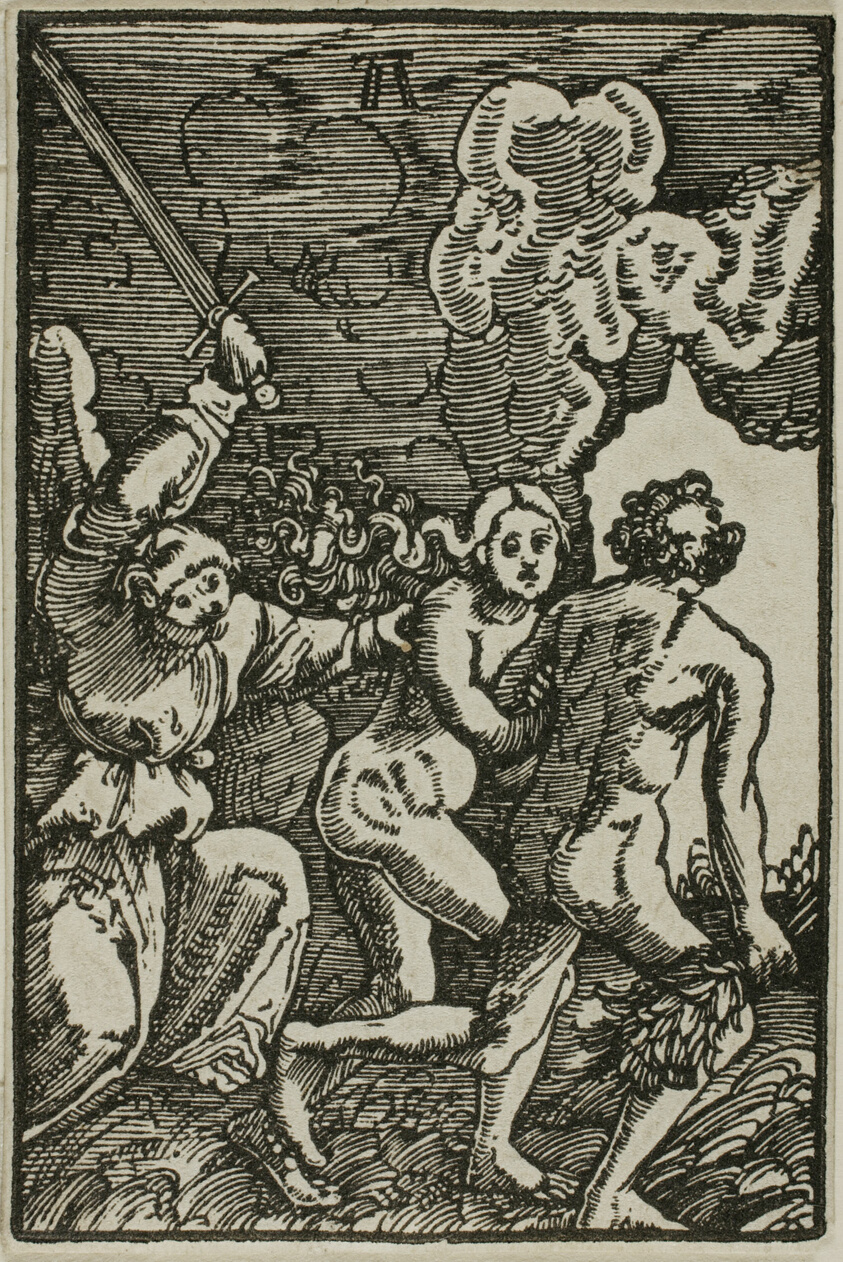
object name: Print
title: The Expulsion from Paradise, from The Fall and Redemption of Man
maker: Albrecht Altdorfer (German, c.1480-1538)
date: 1513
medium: Woodcut in black on ivory laid paper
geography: Germany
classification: wood engraving; print; prints and drawing